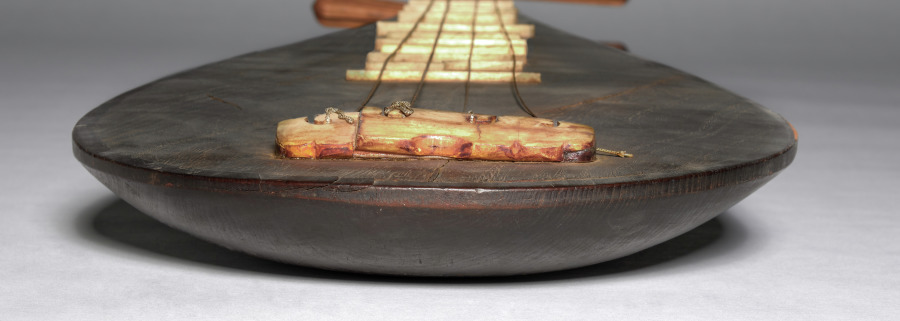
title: Pipa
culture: China, Qing dynasty (1644-1911)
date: 1800s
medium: Wood, ivory, bone, gut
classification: Musical Instrument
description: The term pipa, known since the 3rd century BC, describes the playing motion of the right hand: pi, “to play forward” (left), and pa, “to play backward” (right). A type of lute played with the fingers, it is used in opera and storytelling ensembles and has an impressive, virtuosic solo repertoire. Historic imagery, such as wall paintings, documents the spread of the pipa, along the Silk Road from western and central Asia to China. The bat finial here is a commonly used device on 19th-century Chinese lutes symbolizing good luck.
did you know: The string holder is made of bone.